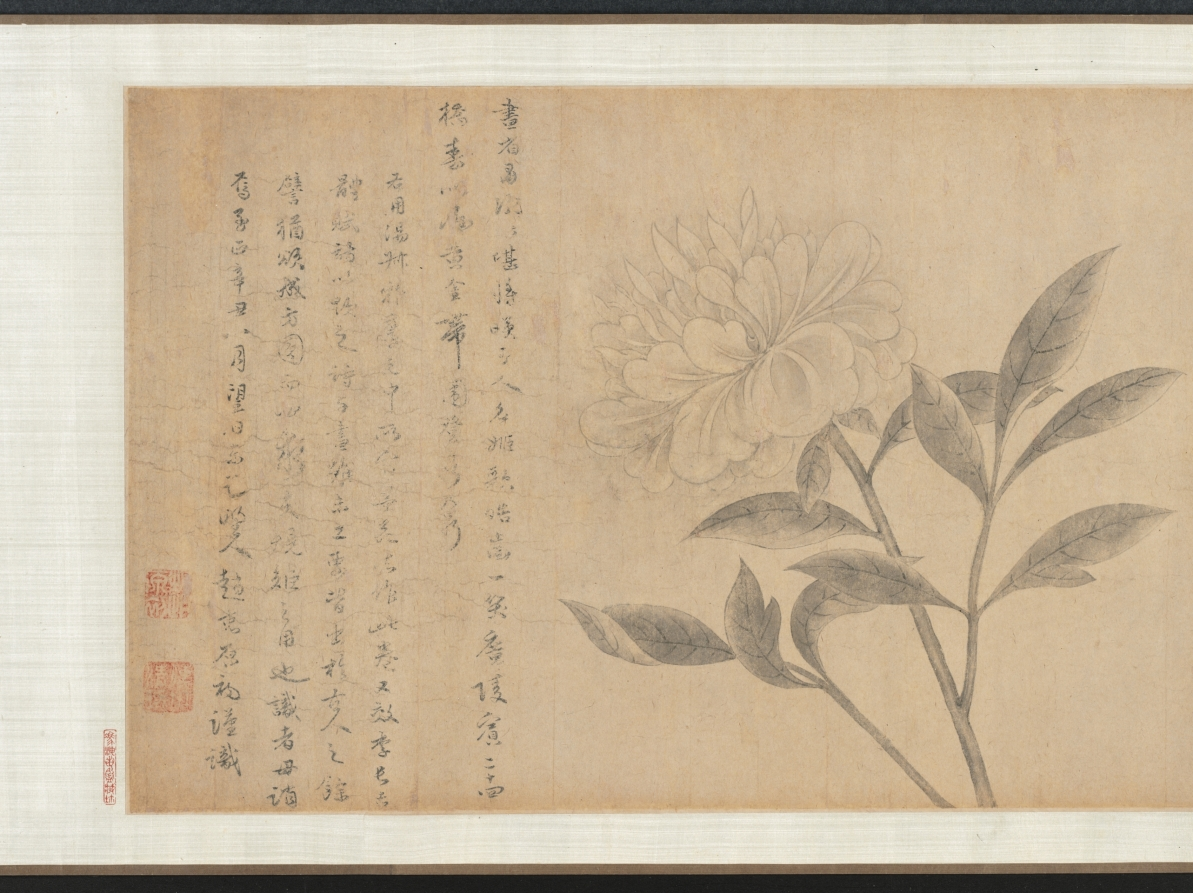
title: Ink Flowers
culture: China, Yuan dynasty (1271-1368)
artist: Zhao Zhong (Chinese, second half of the 1300s)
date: 1361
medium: Handscroll; ink on paper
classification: Painting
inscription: 寶帶同心結，香羅合歡扇。/ 繡作錦鴛鴦，雙雙為君獻。/ 薔薇露灑熏籠衣，馨香奉君君勿違。 原初并題。 [印] 趙衷原初畫記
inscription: 翠袂素羅韈，玉臺黃金盃。浩歌渡弱水。天風卷海三山開，麻姑方平為招飲，蛟宮獻舞銀濤堆。 原初并題。 [印] 雲林清趣、[印] 趙衷原初畫記。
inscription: 右用湯叔雅慶元中所寫墨花法作此卷，又效李長吉體賦詩以題之。詩與畫雖未工，要皆出於古人之餘，譬猶欲成方圓而必求其規矩之用也，識者毋誚焉！至正辛丑八月望日，東吳野人趙衷原初謹識。 [印] 趙原初、[印] 傳世清玩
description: Zhao Zhong's flowers, each paired with a poem, echo the fine-style colored flowers of the academic tradition, but instead he used only ink. Fine lines define the contours of each plant, as well as the veins within each petal and leaf. Careful ink washes give subtle modeling to the forms. The combination of lily, narcissus, and peony is unusual as the three belong to no known seasonal or symbolic system popular in the fourteenth century. Zhao’s medical training may have influenced the selection. Powdered lilies, for example, were prescribed to dispel grief, while the bark of tree peony roots was used as a treatment for various blood disorders.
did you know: This handscroll is a very rare example of ink flowers in the linear baimiao style of the fourteenth century.